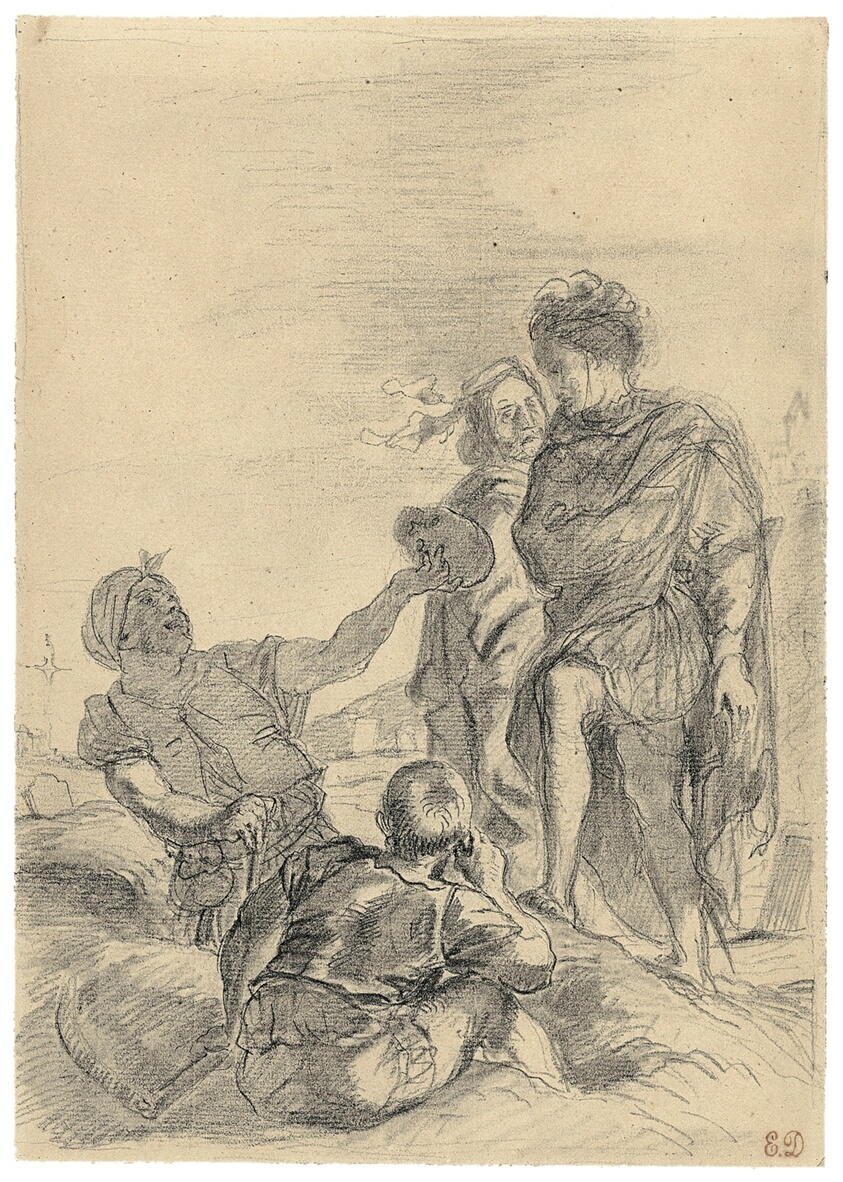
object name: Drawing and Watercolor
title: Hamlet and the Gravediggers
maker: Eugène Delacroix (French, 1798–1863)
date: 1843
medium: Black chalk, with touches of graphite, on cream laid paper, laid down on cream wove paper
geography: France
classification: drawings (visual works); paper; chalk; prints and drawing